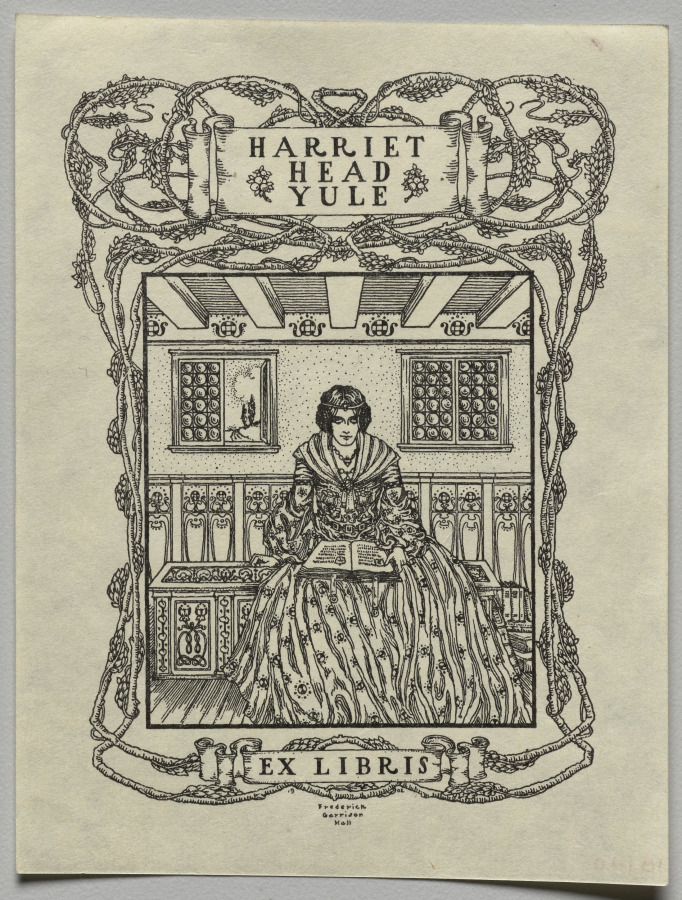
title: Bookplate: Harriet Head Yule, Ex Libris inscribed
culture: America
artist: Frederick Garrison Hall (American, 1879–1946)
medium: engraving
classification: Print